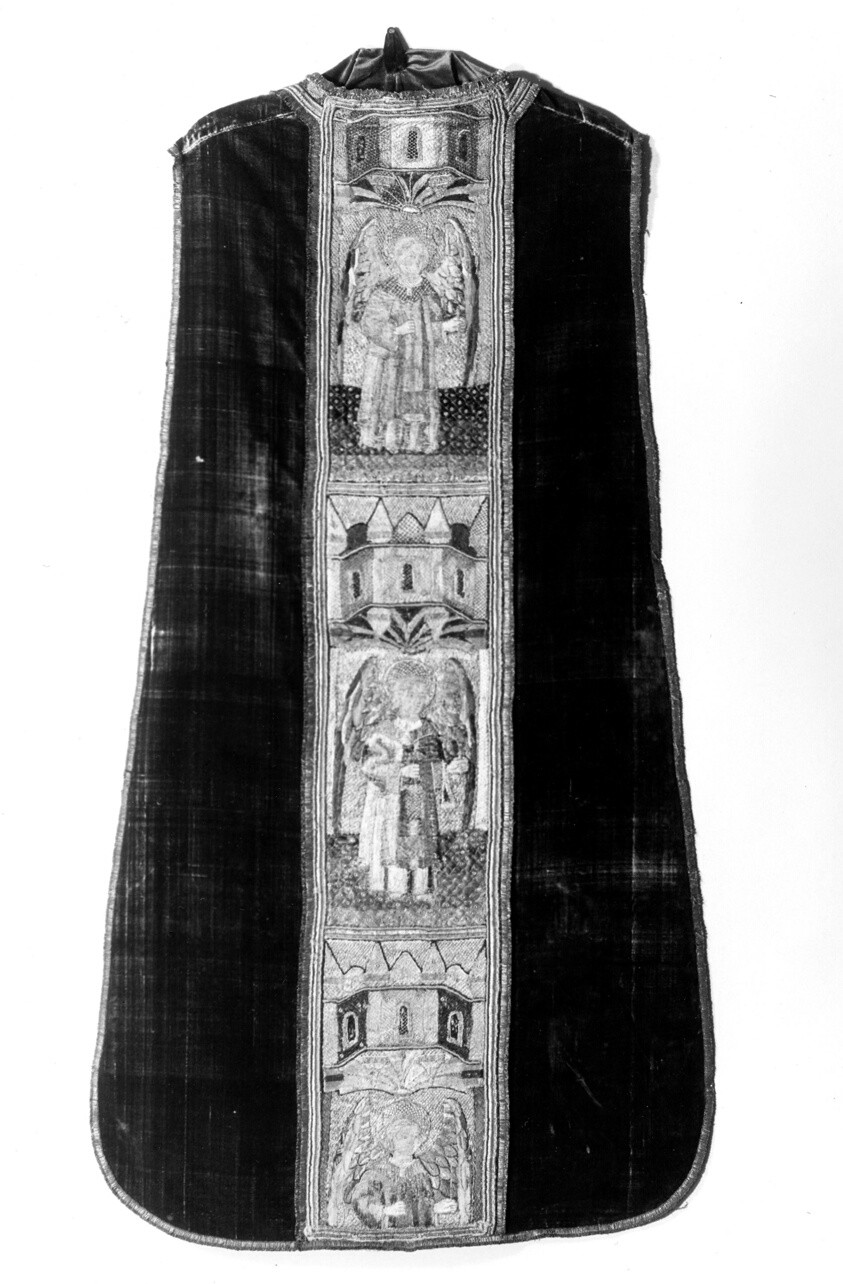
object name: Textile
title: Chasuble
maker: Spain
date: 16th century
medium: Genoese red velvet with Orphreys divided into six panels, embroidered in colored silks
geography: Spain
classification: textile; needlework (visual works); costume; liturgical